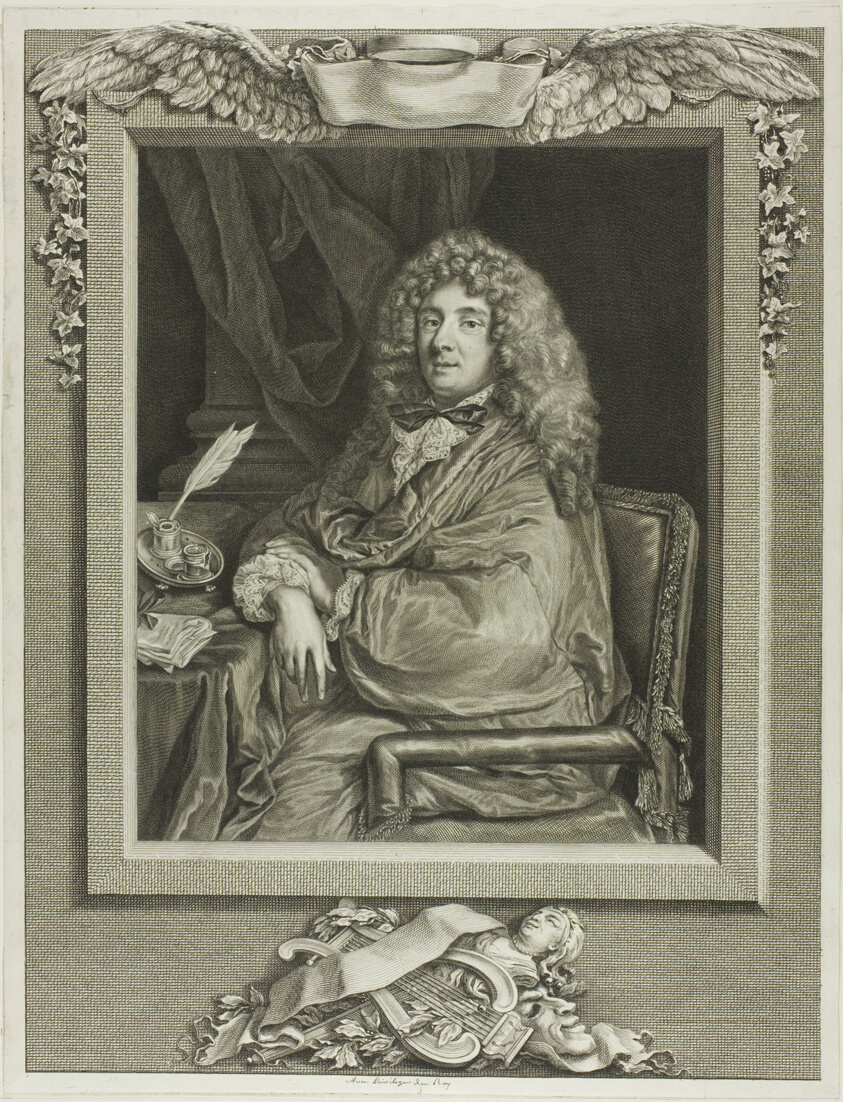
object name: Print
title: Molière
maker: Jacques Firmin Beauvarlet (French, 1731-1797)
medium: Engraving on paper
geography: France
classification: etching; print; prints and drawing